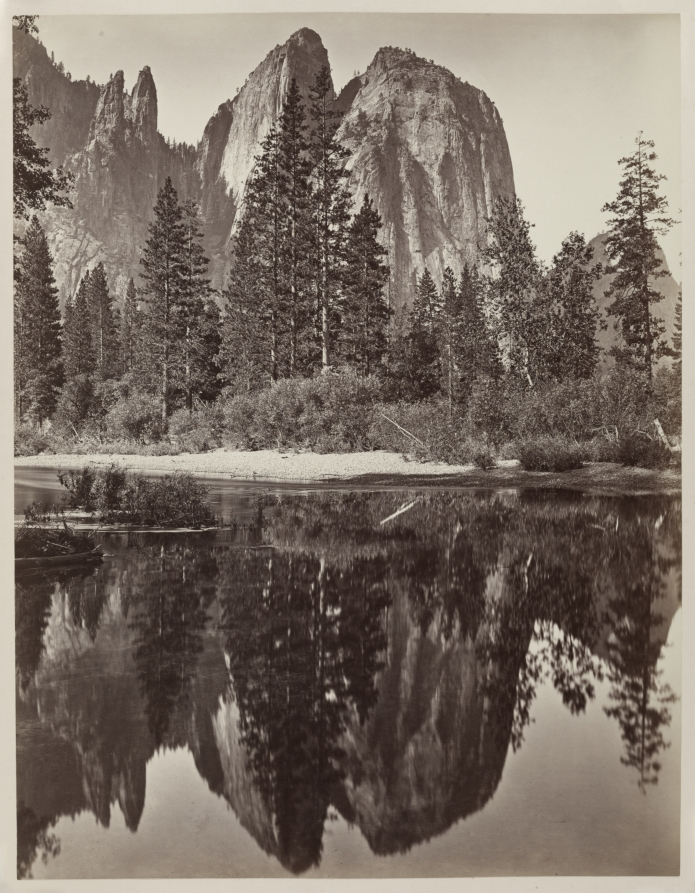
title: Cathedral Rocks and Reflections, Yosemite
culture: America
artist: Charles Leander Weed (American, 1824–1903)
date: 1864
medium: albumen print from wet collodion negative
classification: Photograph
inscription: Written in pencil on verso: "Cathedral Rocks & Reflections"; "E.B. Child, 1939 / Cathedral Rocks & Reflections / Yosemite, CA"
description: In 1859, Charles L. Weed made the first photographs of the Yosemite region. Using the wet collodion process, he produced 40 stereoviews and some 20 large (10 x 14 inches) glass negatives. His pioneering photographs informed future visitors and artists of the region's scenic splendors. About five years later, in 1864, he returned to create his remarkable mammoth plate views (approximately 17 x 22 inches) of the valley. This image of Cathedral Rocks is among the best examples of Weed's ability to combine sublime subject matter with observation. With graceful precision, he captured the complex landscape, fully reflected in the mirror-like surface of the lake's calm water.